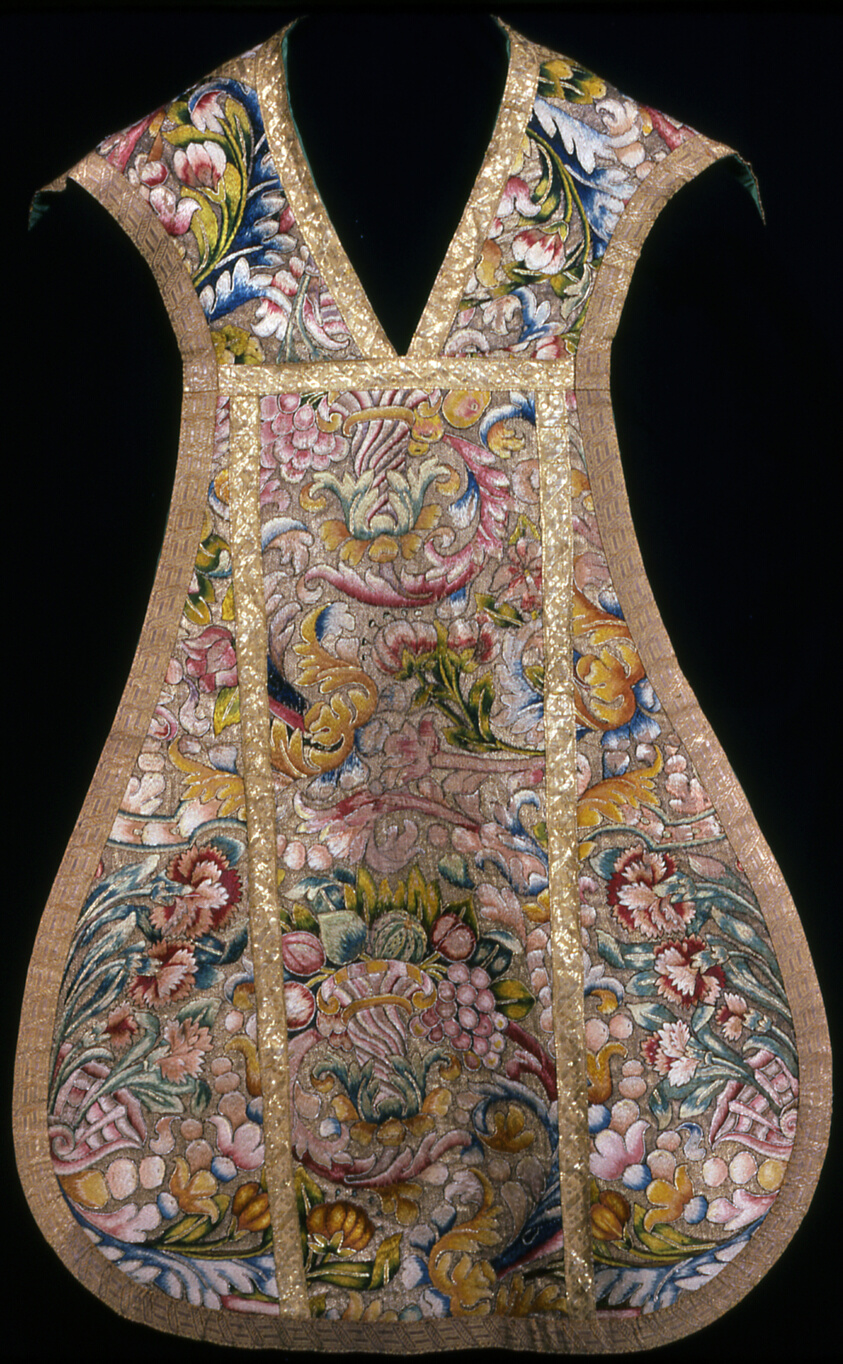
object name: Textile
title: Chasuble with Medallion Depicting John the Baptist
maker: After a fresco by Andrea del Sarto (Italian, 1486–1530) (Tondo only); Italy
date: 1575/1625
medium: Linen, plain weave underlaid with silk, plain weave with insert medallion of silk, warp-float faced satin weave; embroidered with silk and gilt- and silvered-metal-strip-wrapped silk and linen in satin, split and stem stitches; couching and French knots; edged with silk and gilt-metal-strip-wrapped silk, plain weave with patterning wefts and complementary weft weave tapes; lined with silk, plain weave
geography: Italy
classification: textile; liturgical; needlework (visual works)